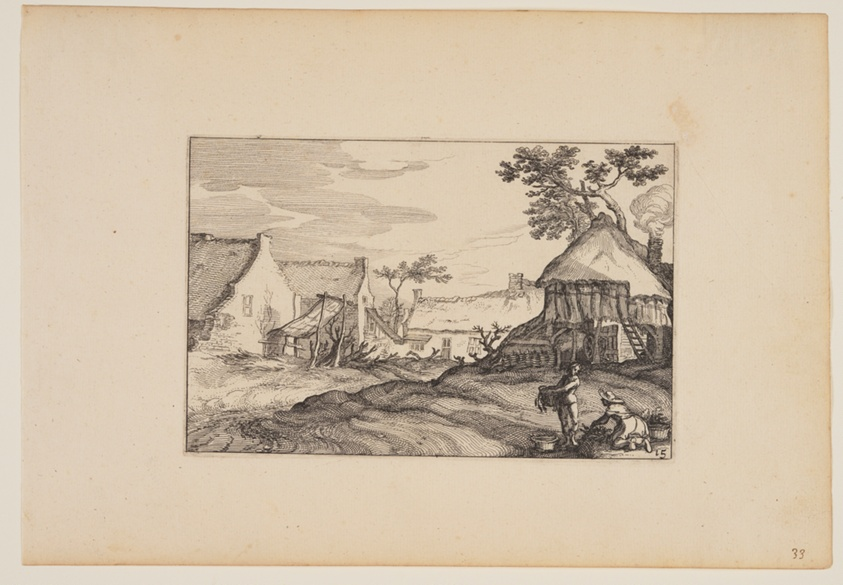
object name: Print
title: Farmyard Young Man and Woman in Foreground, from Landscapes (Verscheyden aerdige Lanthuysen...)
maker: Claes Jansz. Visscher (Netherlandish, c. 1550–c. 1612); after Abraham Bloemaert (Dutch, 1566–1651)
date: 1620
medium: Etching on ivory laid paper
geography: Netherlands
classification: print; paper; prints and drawing; etching